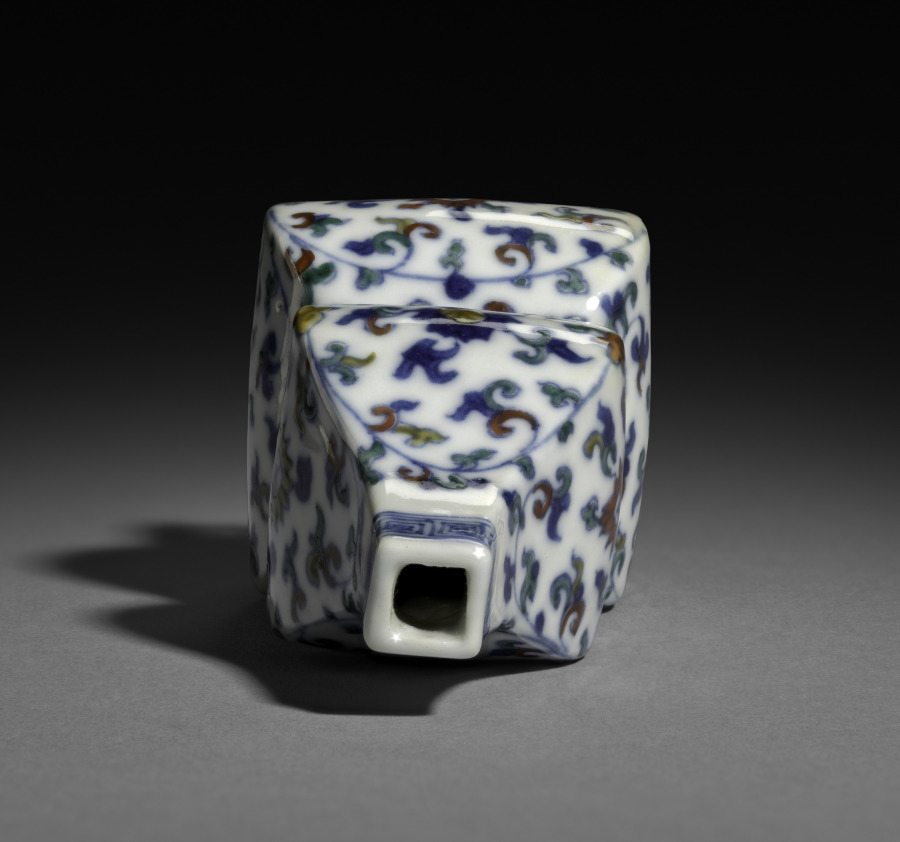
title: Square Double-Gourd Vase with Floral Scrolls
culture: China, Jiangxi Province, Jingdezhen kilns, Ming dynasty (1368–1644), Jiajing mark and reign (1522–66)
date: 1522–66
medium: porcelain with underglaze blue decoration and overglaze enamel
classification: Ceramic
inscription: 大明嘉靖年製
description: In the Ming dynasty (1368–1644), luxury items became more affordable to larger parts of the society, including women, merchants, and literati in non-official positions. Imperial patronage and a growing urban population encouraged consumption of luxury goods and local craftmanship.